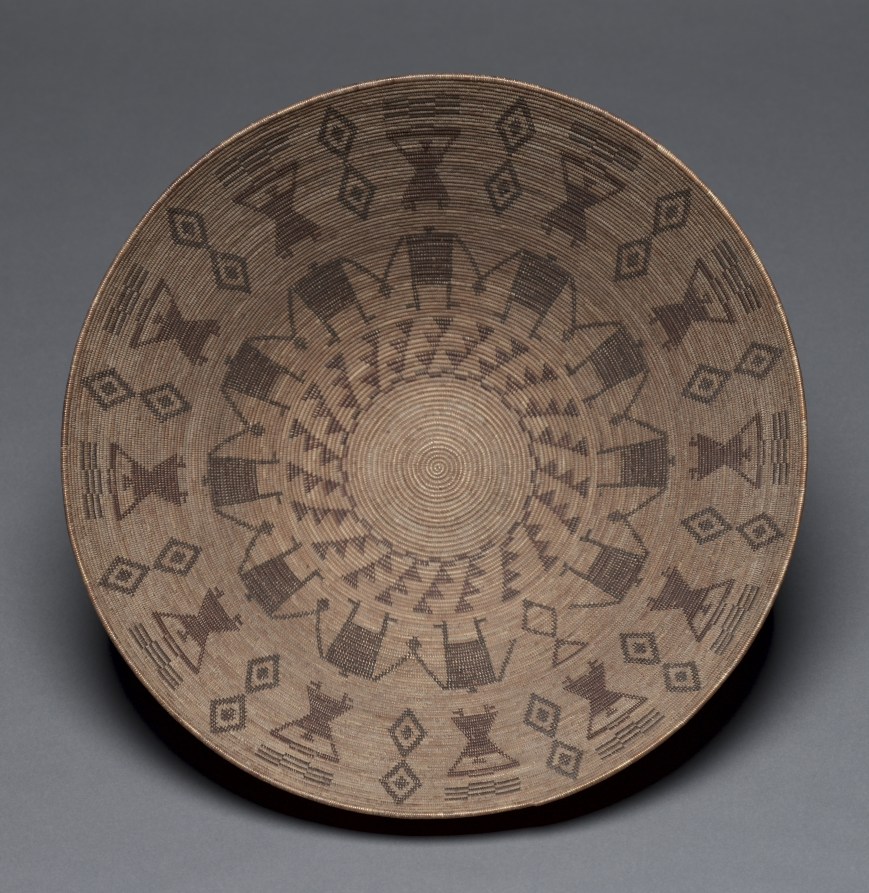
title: Presentation Bowl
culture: Native North America, California, Yokuts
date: 1900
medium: redbud, bracken fern; coiled, grass foundation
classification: Basketry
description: This fine bowl was created by a weaver of the Yokuts, who lived in California’s San Joaquin Valley to the west of Koso (Panamint) Shoshone territory. Shared design motifs indicate contact between the two areas. For instance, the humans who appear to be holding hands in one register on this basket also occur on a small Koso (Panamint) Shosone basket in the collection.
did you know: This fine bowl was created by a weaver of the Yokuts, who lived in California’s San Joaquin Valley.